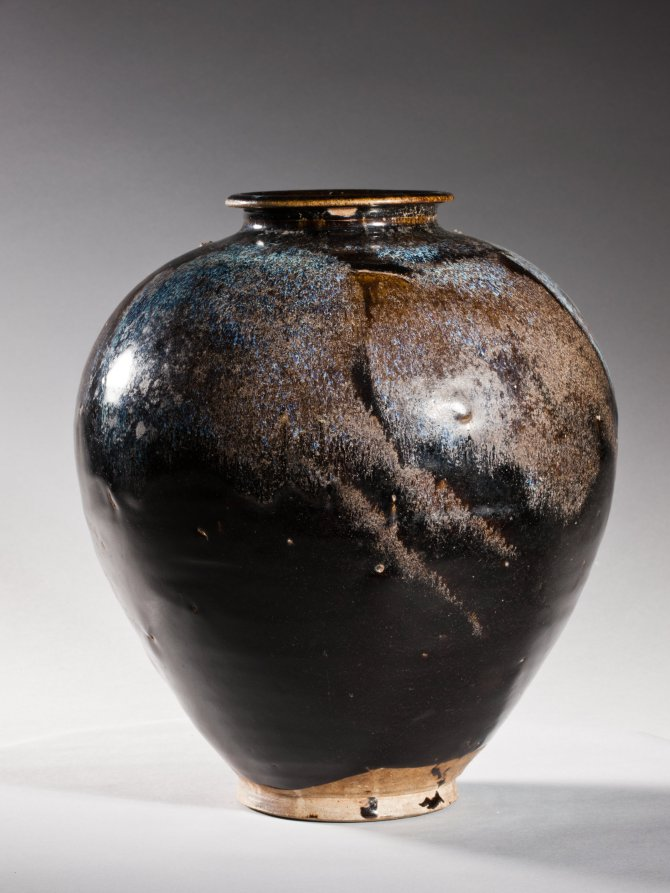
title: Jar: Black Ware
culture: China, Henan province, Huangdao kilns, Tang dynasty (618-907)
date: 700s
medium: glazed stoneware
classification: Ceramic